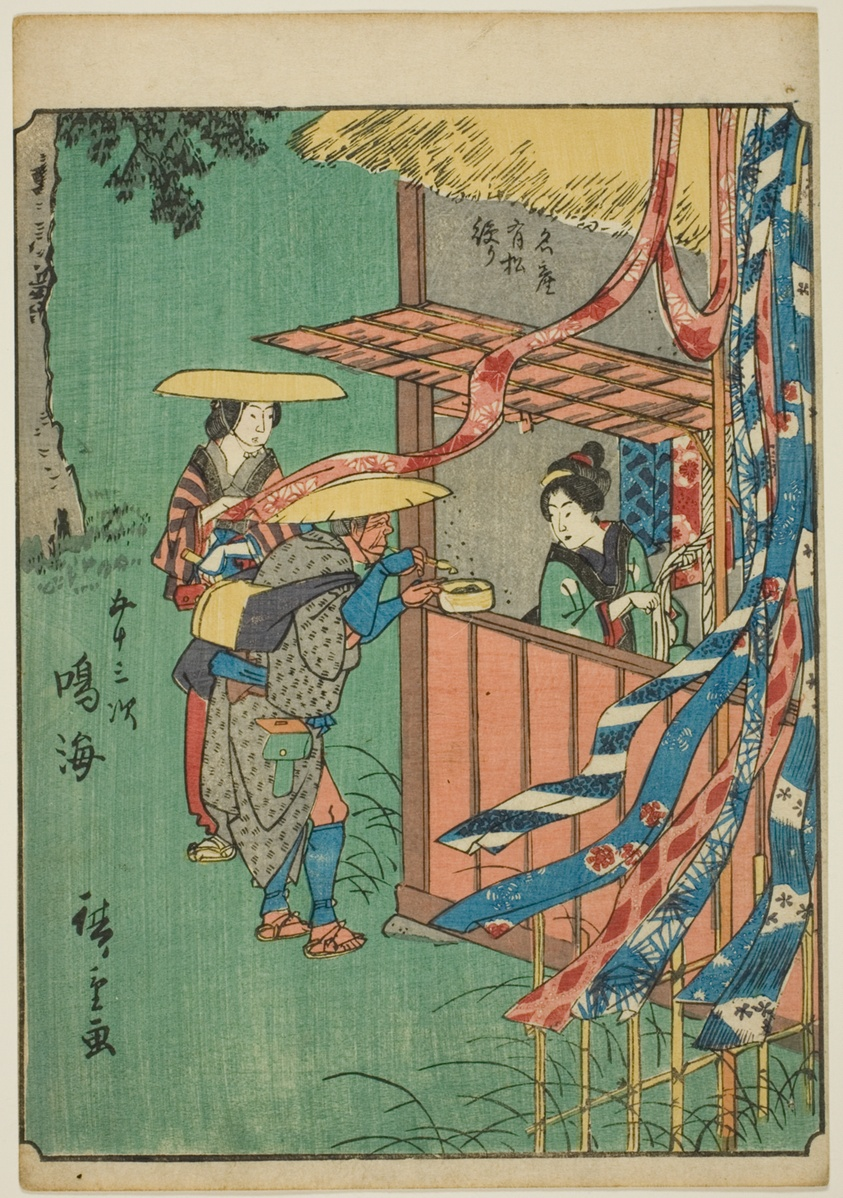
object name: Print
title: Narumi, from the series "Fifty-three Stations [of the Tokaido] (Gojusan tsugi)," also known as the Figure Tokaido (Jinbutsu Tokaido)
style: Japanese (culture or style)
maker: Utagawa Hiroshige 歌川 広重; Japanese, 1797-1858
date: 1852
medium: Color woodblock print; chuban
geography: Japan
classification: woodblock print; print